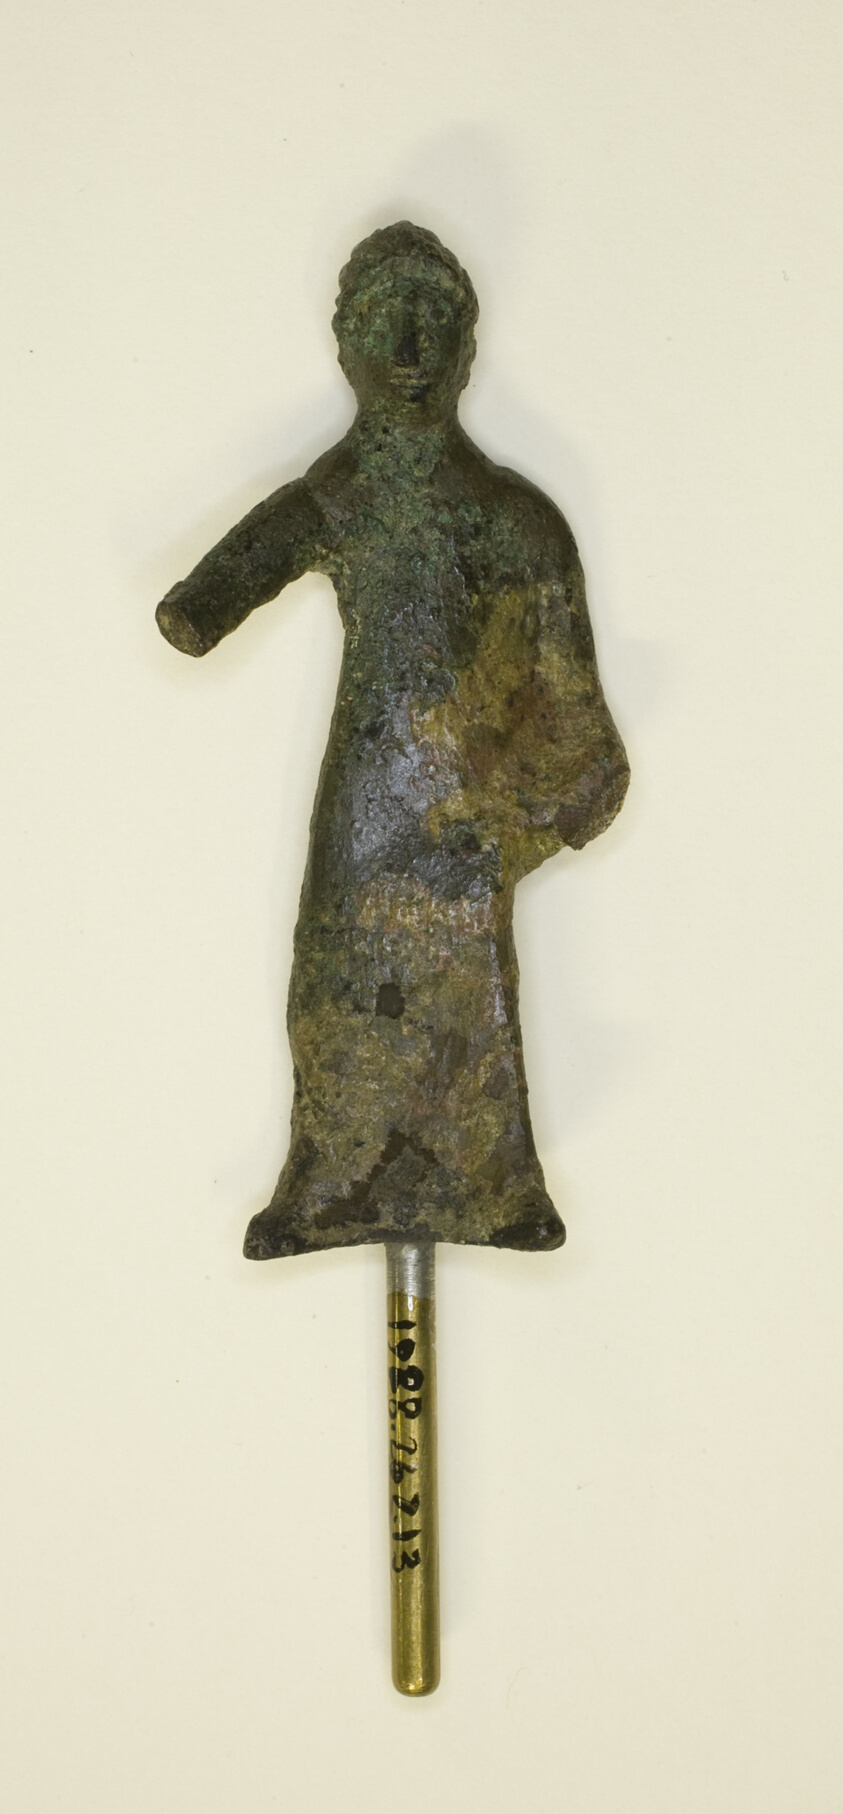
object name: Sculpture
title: Statuette of a Woman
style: etruscan, ancient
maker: Etruscan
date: 4th century BCE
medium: Bronze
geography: Etruria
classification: statuette; bronze; metal; sculpture; ancient art